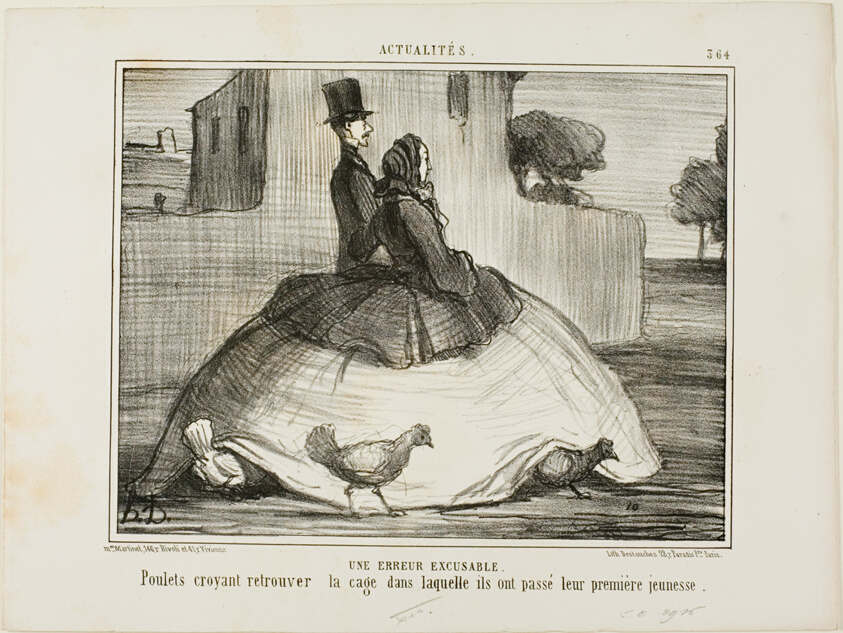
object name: Print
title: An Excusable Error. Chickens thinking they have found the cage where they spent their early childhood, plate 21 from La Crinolomanie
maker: Honoré Victorin Daumier; French, 1808-1879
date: 1857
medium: Lithograph in black on white wove paper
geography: France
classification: lithograph; print; prints and drawing